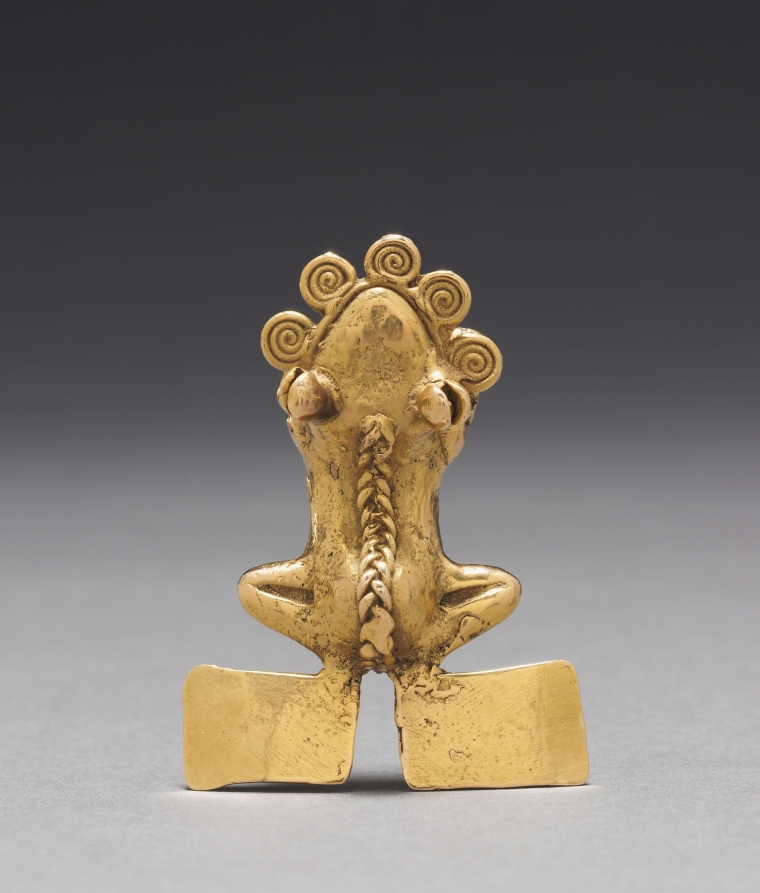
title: Frog Pendant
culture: Western Panama, Veraguas-Gran Chiriquí Style, c. 1000-1550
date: c. 1000–1550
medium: cast and hammered gold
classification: Metalwork